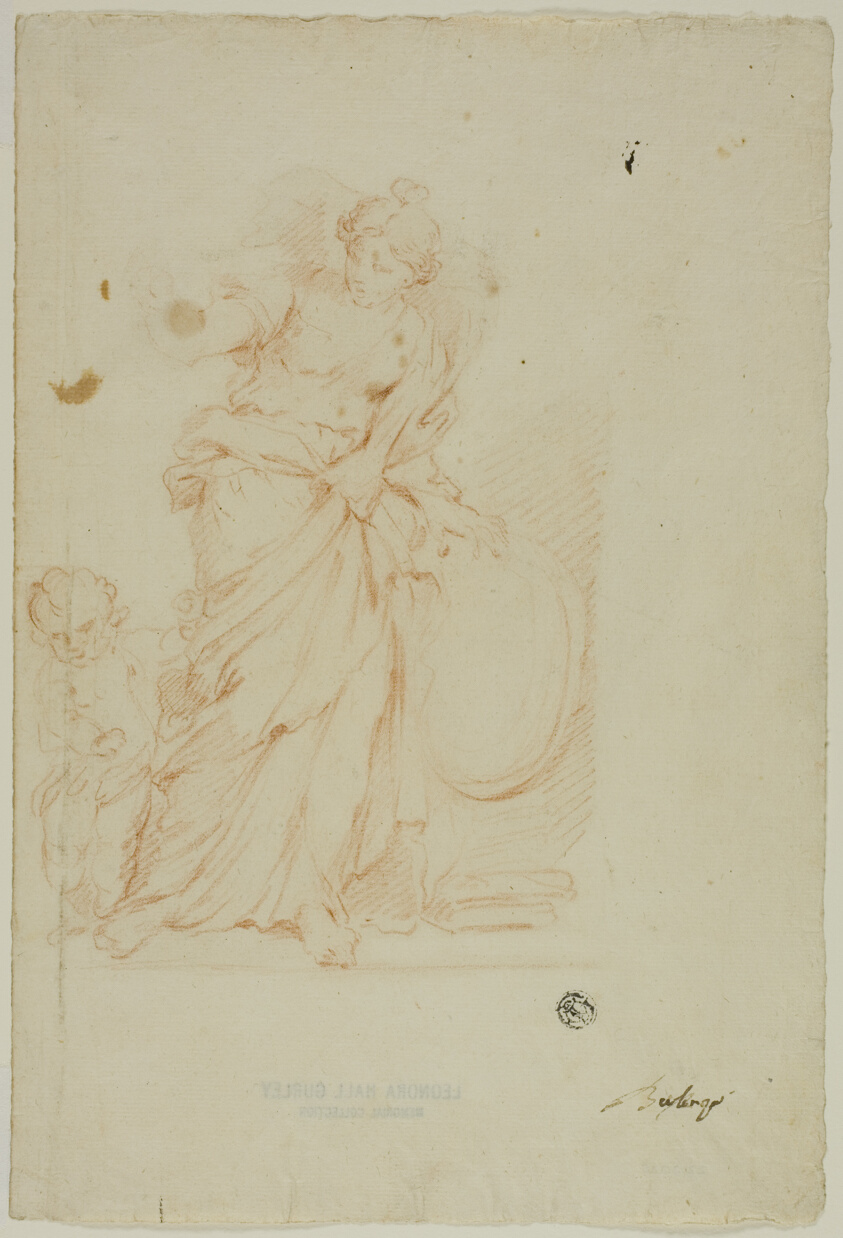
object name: Drawing and Watercolor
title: Allegory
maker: Unknown Artist; French, 18th century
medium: Red chalk, on ivory laid paper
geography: France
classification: chalk; drawings (visual works); prints and drawing